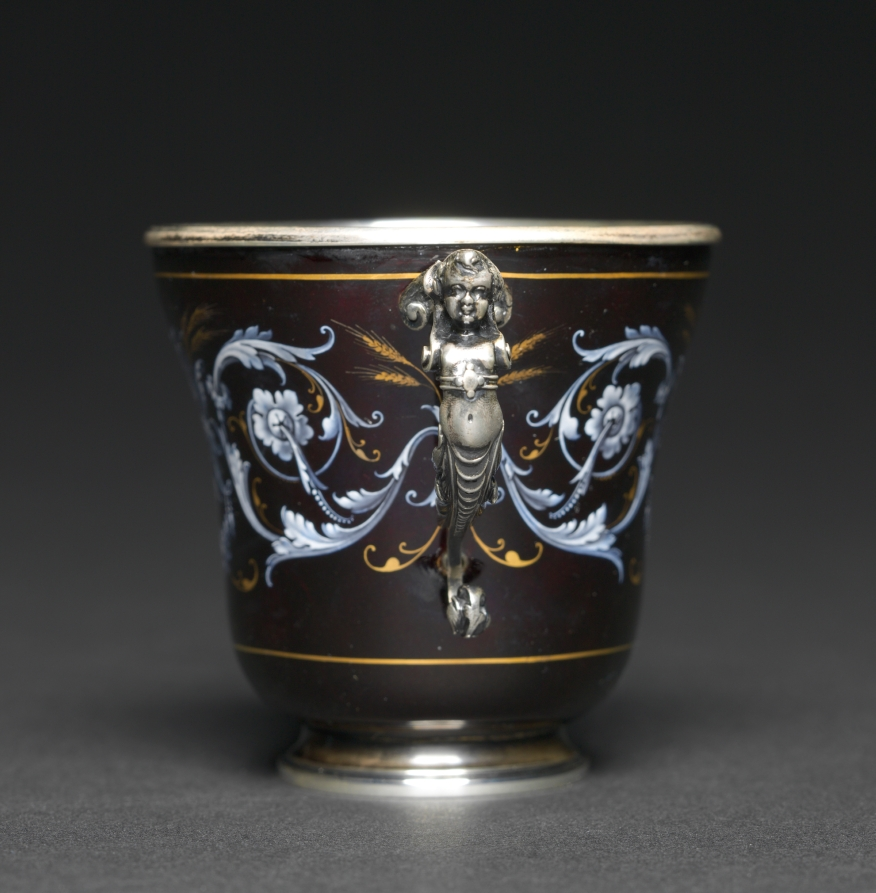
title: Cup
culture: France, 19th century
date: c.1880–1900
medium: silver, enamel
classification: Enamel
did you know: This cup and saucer were made during the Belle Epoque or "Beautiful Era" in France.